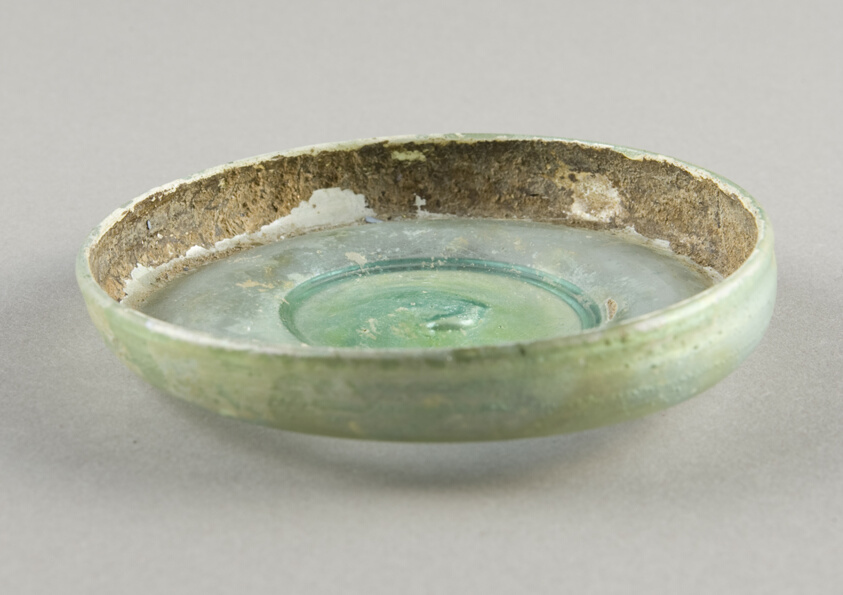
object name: Vessel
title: Plate or Dish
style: syrian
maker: Roman; Levant or Syria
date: 1st-4th century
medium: Glass, blown technique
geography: Syria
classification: dish (vessel); glass; vessel; ancient art